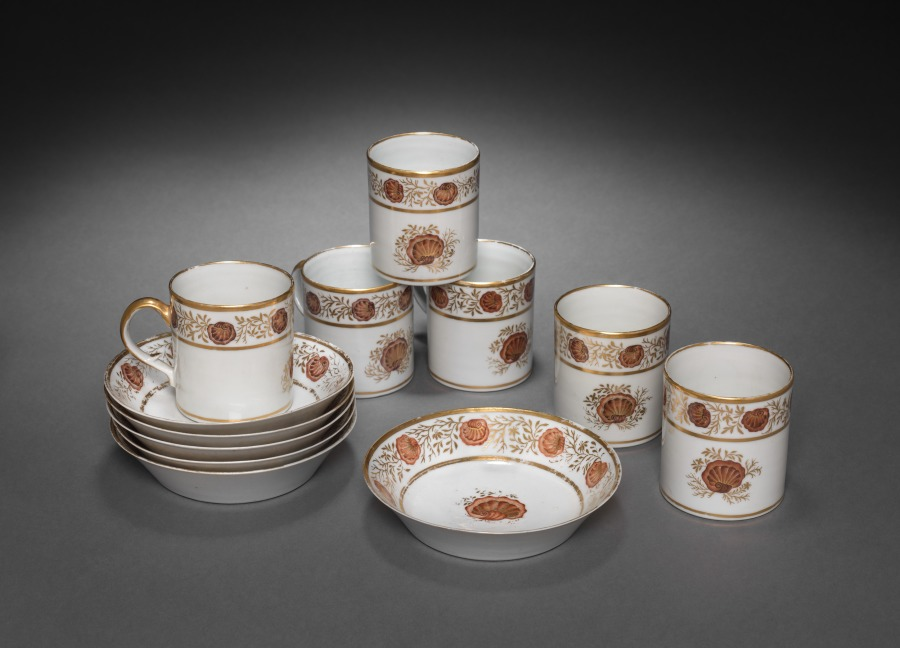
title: Cups and Saucers from Oliver Wolcott, Jr. Tea Service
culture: Chinese Export porcelain, late 18th-early 19th century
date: 1785–1805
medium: porcelain, sepia enamel, gold leaf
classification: Ceramic